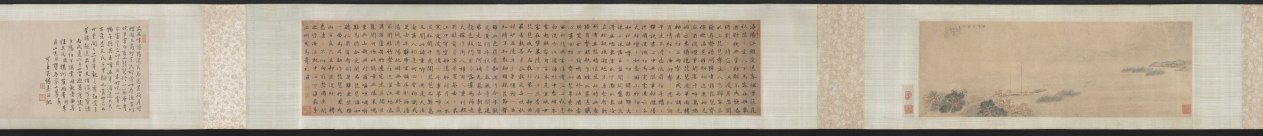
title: Saying Farewell at Xunyang (Song of the Pipa)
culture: China, Ming dynasty (1368–1644)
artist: Wen Boren (Chinese, 1502–1575)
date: 1500s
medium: handscroll, ink and color on paper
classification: Painting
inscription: "潯陽送客圖" 五峰山人文伯仁寫于停雲館中 [印] 文伯仁; 五峰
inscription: 2 colophons and 9 additional seals: 1 transcription of "Pipa xing 琵琶行” (Song of Pipa) and 3 seals of Zhu Yizun 朱彜尊 (1629-1709); 2 seals of Wu Rongguang 吳榮光 (1773-1843); 1 colophon, dated 1826, and 3 seals of Wu Xijia 吳錫嘉 (mid-1700s)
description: This handscroll depicts The Song of the Pipa, a poem by Bai Juyi 白居易 (772–846) written after the poet’s encounter with a pipa player on the Yangzi River. Expelled from her home city when her beauty and fame had faded, she played for the poet at night. Her musical performance and tragic life story resonated with Bai Juyi, who had just been demoted and exiled from life at court himself. The hazy, vast view and pale color tonalities of this painting illustrate these feelings of endless sadness, having lost one’s sense of purpose in life.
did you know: Wen Boren depicted the chilly autumn water with a fishnet pattern.